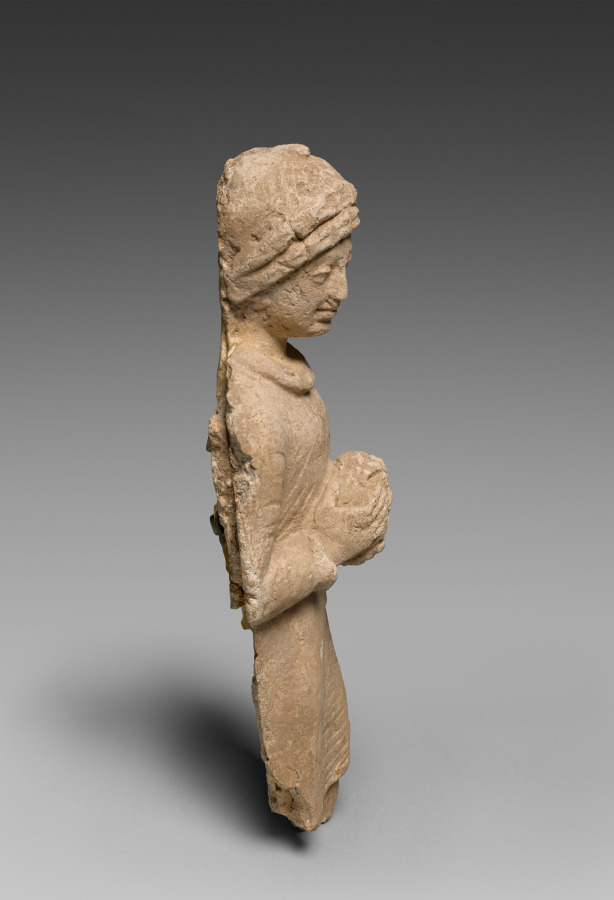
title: Layman bearing offerings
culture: Afghanistan, Hadda, probably Tape Shotor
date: c. 300 CE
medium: stucco with mother-of-pearl inlay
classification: Sculpture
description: The Buddhist monasteries at Hadda were famous internationally until their destruction by fire in the 800s CE. One thousand years later, a British explorer named Charles Masson (1800–1853) documented the site and collected many sculptures from the ruins that are now in the British Museum in London. French archaeologists carried out systematic excavations between 1926 and 1929. They brought many sculptures to the National Museum of Asian Art, Guimet, in Paris. Some sculptures entered other museum and private collections around the world. In the 1970s, Afghan archaeologists continued to document the Buddhist sites of Hadda and brought many more sculptures to the National Museum of Afghanistan in Kabul.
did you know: The Buddhist community (sangha) consists of both monks and laypeople who brought wealth to support the monasteries at Hadda.